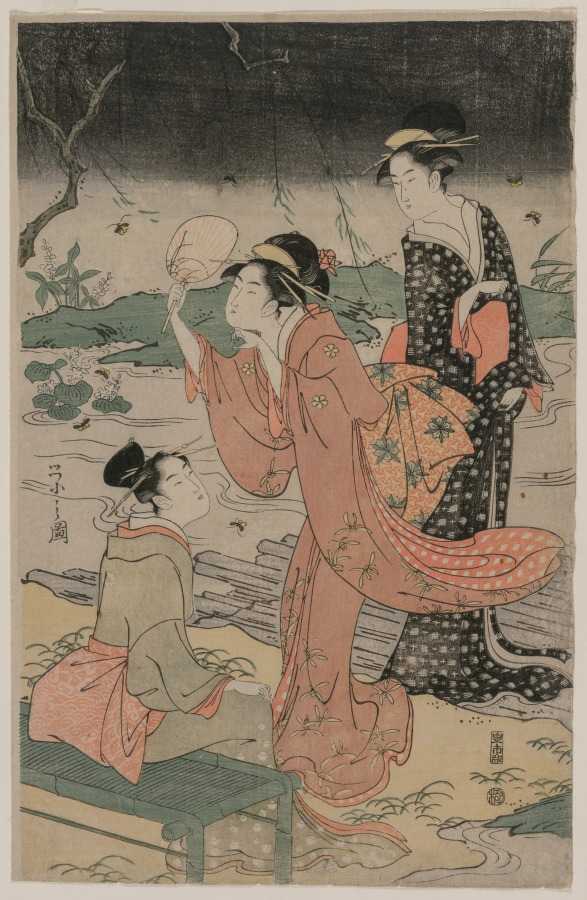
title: Women Beside a Stream Chasing Fireflies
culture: Japan, Edo period (1615–1868)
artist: Chōbunsai Eishi (Japanese, 1756–1829)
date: c. 1796–97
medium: woodblock print; ink and color on paper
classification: Print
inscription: Signature: Eishi zu Seal: kiwame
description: A group of women amuse themselves by chasing fireflies next to a stream. A sense of movement is conveyed by their sleeves fluttering in the breeze.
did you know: This print is the center print from a triptych, but the museum does not have the left and right prints.